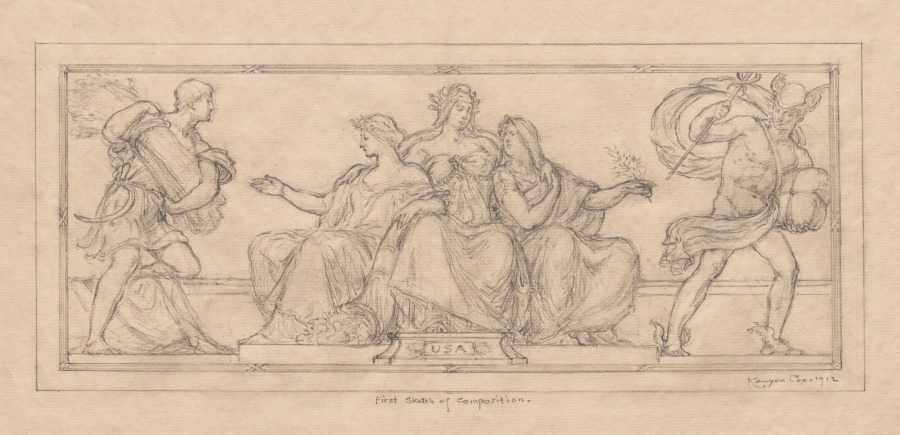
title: Design for United States Currency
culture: America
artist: Kenyon Cox (American, 1856–1919)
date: 1912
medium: graphite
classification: Drawing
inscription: signed, lower right, in graphite: Kenyon Cox. 1912 ; by artist, lower center, in graphite; First Sketch of Composition. ; by unknown hand, lower right, in graphite: 11 x 19 1/2 15 x 23 1/2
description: The painter and muralist Kenyon Cox viewed himself as the heir to the great traditions of the Italian Renaissance and vigorously led the resistance to all forms of modern painting. This design for U. S. currency, which was rejected by the government, shows the care with which he planned his compositions. Cox's son, Allyn, who also became a successful mural painter, posed for the male figure. Cox's brother, J. D. Cox, a prominent civic leader in Cleveland, played an active role in the formation of the Cleveland Museum of Art. He gave the museum the three works by his brother that are in this exhibition.